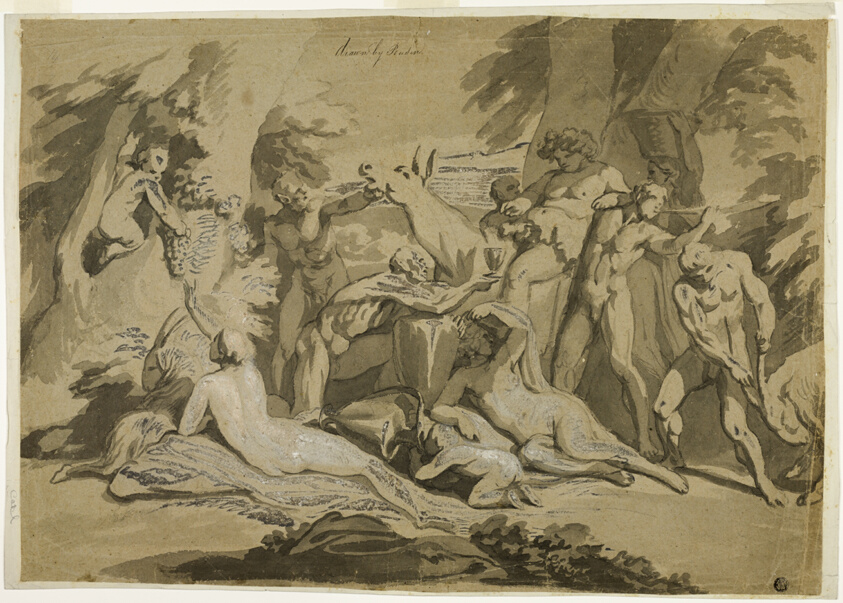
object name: Drawing and Watercolor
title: Drunken Silenus Satyr and Nymphs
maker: Possibly Nicolas Poussin; French, 1594-1665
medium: Brush and black and gray wash, heightened with lead white (discolored), over black chalk on tan laid paper, perimeter mounted on ivory wove paper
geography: France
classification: ink or chalk wash; drawings (visual works); prints and drawing